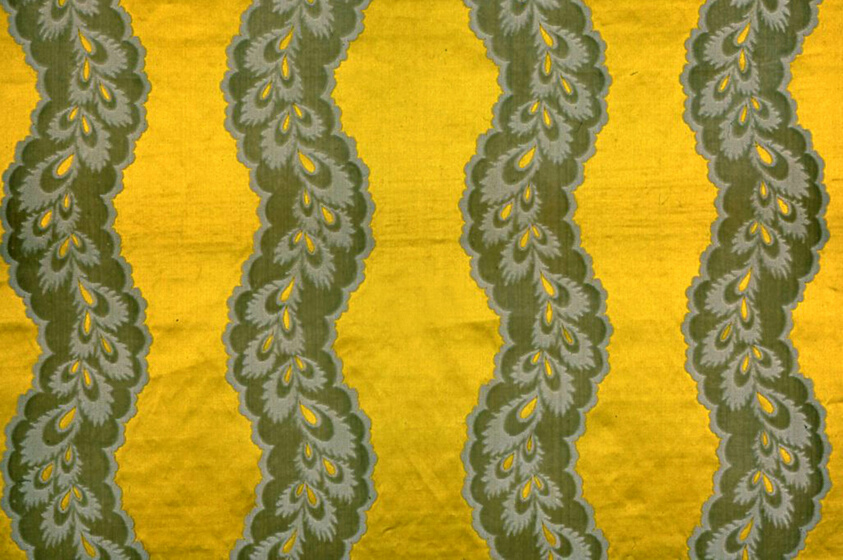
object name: Textile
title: Panel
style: empire, european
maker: France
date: Empire period, 1804/14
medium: Silk and cotton, warp-float faced satin weave with supplementary pile warps forming cut and uncut, voided velvet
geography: France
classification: textile; weaving; weaving - velvet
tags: foliage